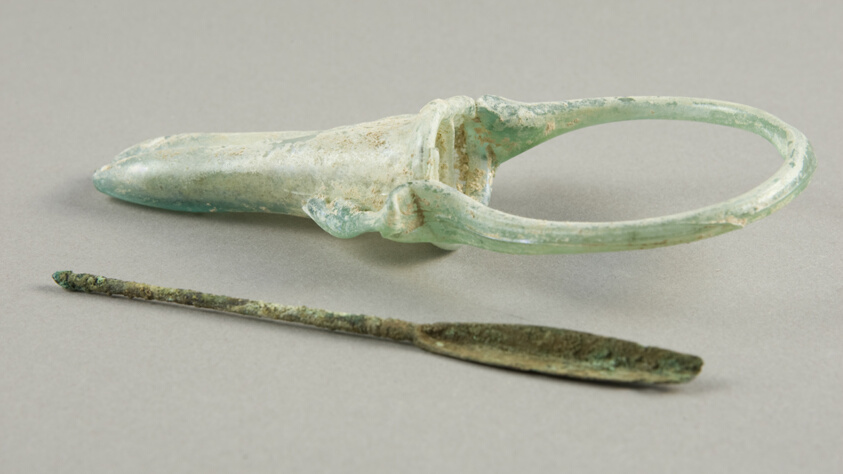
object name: Vessel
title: Cosmetic Container and Applicator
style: roman (ancient, style or period), ancient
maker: Roman; Eastern Mediterranean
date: 4th century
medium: Glass and bronze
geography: Italy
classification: glass; ancient art; vessel